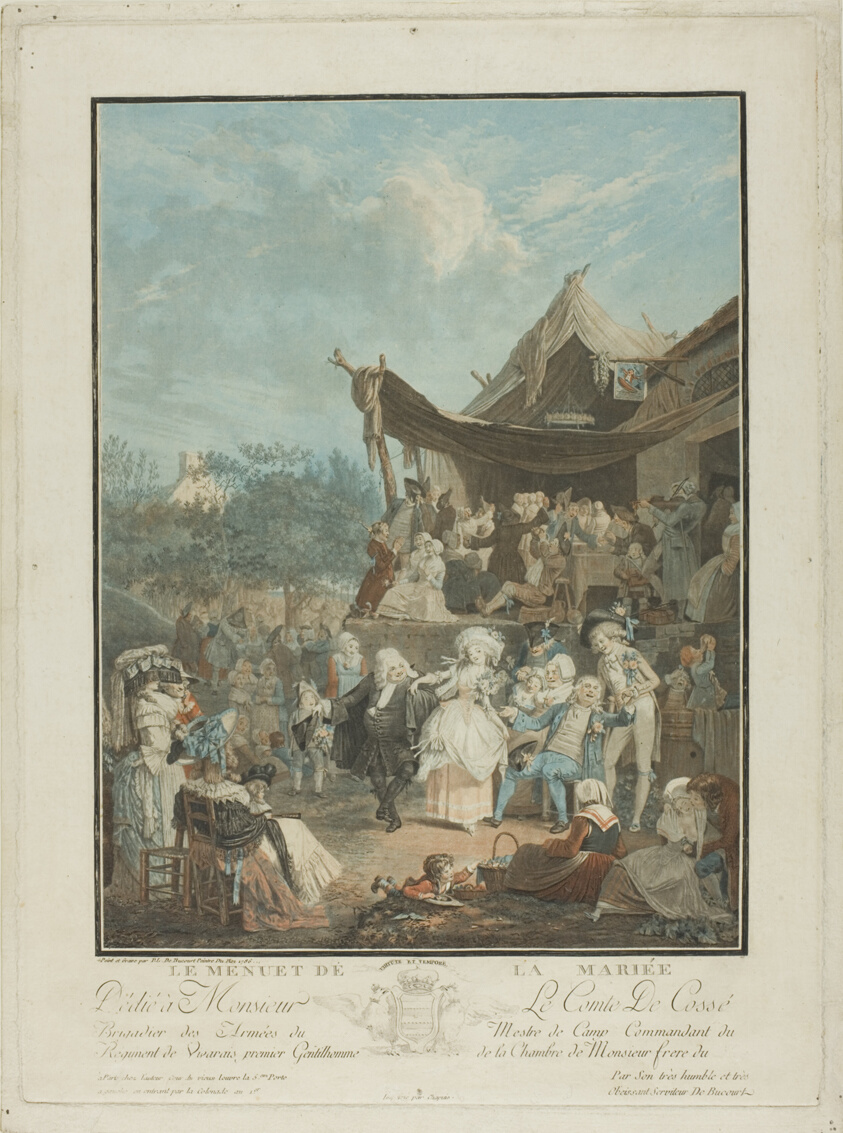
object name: Print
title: Le Menuet de la mariée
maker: Philibert Louis Debucourt (French, 1755-1832)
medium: Color aquatint with etching and engraving in black ink on cream laid paper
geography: France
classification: engraving; print; prints and drawing